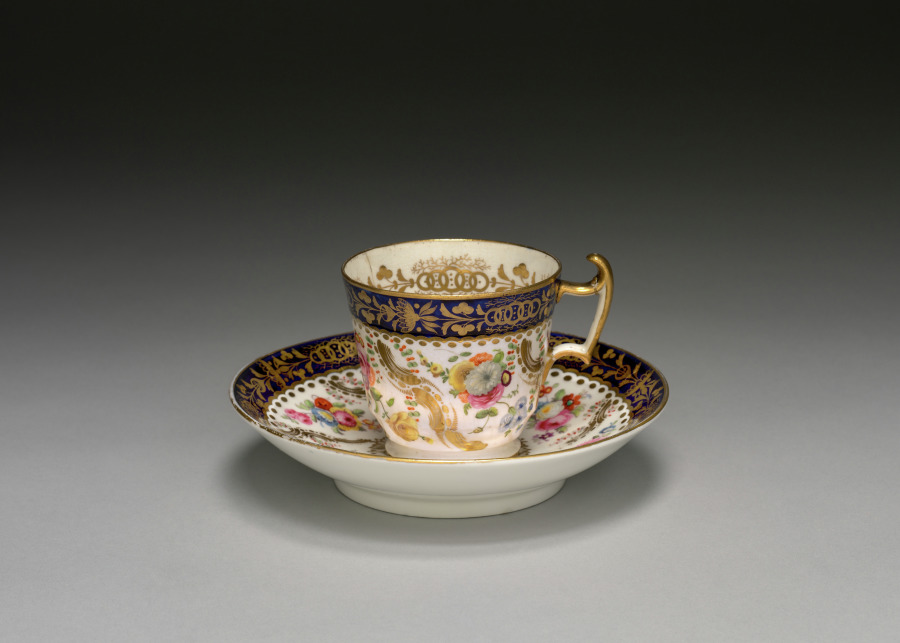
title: Cup and Saucer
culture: England, Staffordshire, late 18th century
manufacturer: Spode Factory (British)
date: late 1700s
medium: porcelain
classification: Ceramic